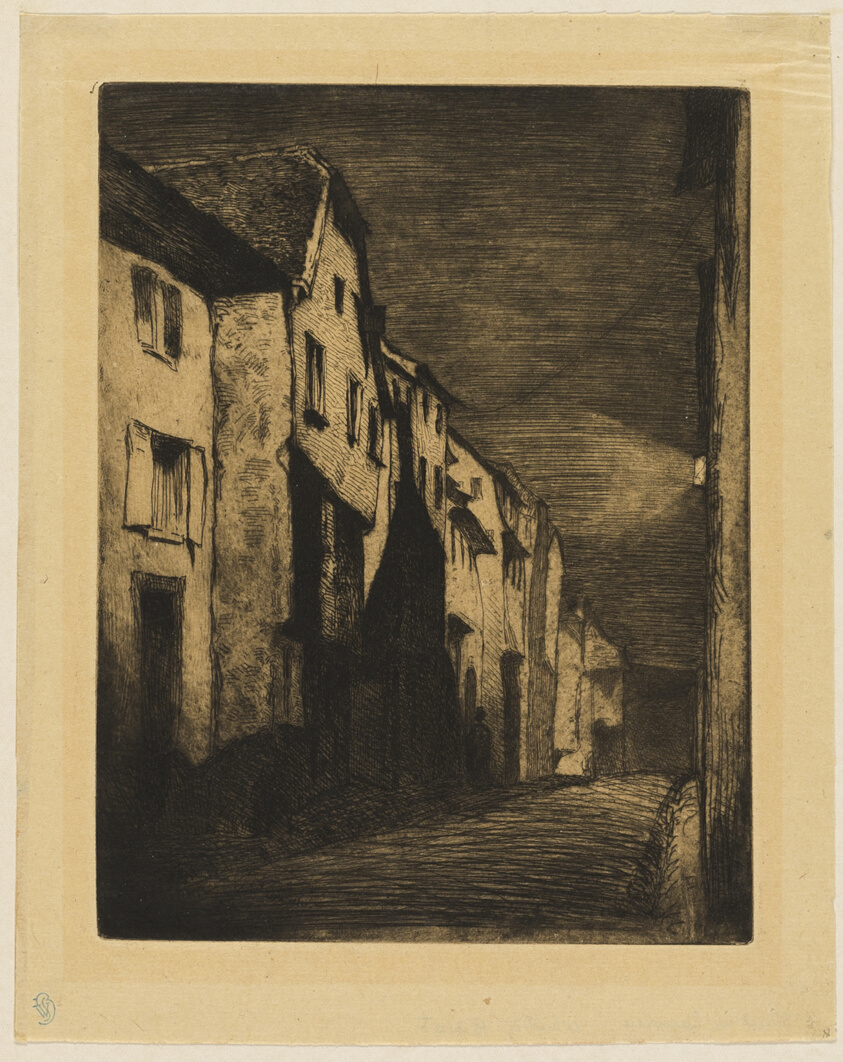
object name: Print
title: Street at Saverne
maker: James McNeill Whistler (American, 1834-1903)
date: 1858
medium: Etching with foul biting in black ink on tan Japanese paper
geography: United States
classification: etching; foul biting; print; prints and drawing; paper